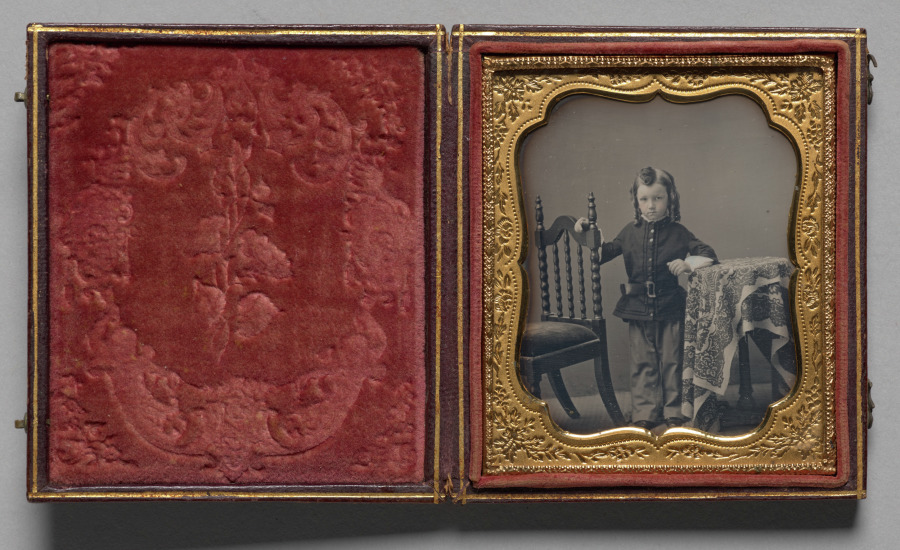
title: Standing boy with bottle curls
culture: America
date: c. 1853–54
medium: daguerreotype, sixth plate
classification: Photograph